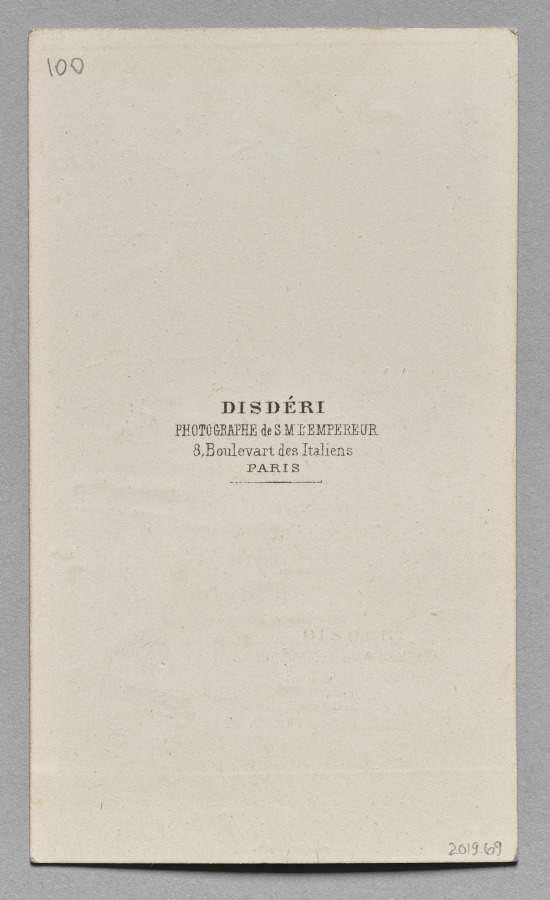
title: Mosaique: The Imperial Court of Napoleon III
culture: France, 19th century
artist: André Adolphe-Eugène Disdéri (French, 1819–1889)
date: c. 1866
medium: albumen print, montage carte-de-visite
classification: Photograph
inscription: Imprinted in black type on recto of mount: “Disdéri Phot/MOSAIQUE./Breveté s g.d.g”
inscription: Written in pencil on verso of mount: “100”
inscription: Imprinted in black type on verso of mount: “Disdéri/Photographe de S.M. L’Empereur/8, Boulevart des Italiens/Paris”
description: The mosaic cards offered visual catalogues of the luminaries of a profession or social group in a single photograph. Here the emperor, his wife, and son top a pyramid of statesmen, soldiers, artists, writers, and others affiliated with the imperial court. This image was produced by cutting hundreds of figures photographed by Disdéri away from their backgrounds, mounting the likenesses on a single sheet, photographing that collage, and printing it on 6 x 9 cm cards.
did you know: Disdéri bragged that the mosaique could offer a picture of “from two or three persons up to a thousand for the same price” as a photograph of one individual.